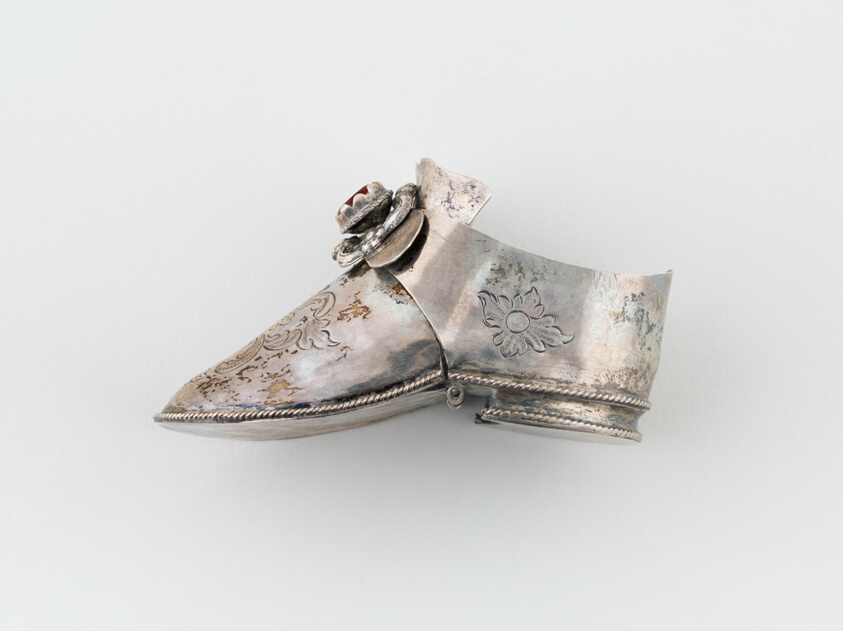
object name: Metalwork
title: Good Luck Token in the Form of a Shoe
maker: Netherlands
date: c. 1840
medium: Silver and glass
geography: Netherlands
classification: metalwork; european decorative arts; silver; decorative object/ornament